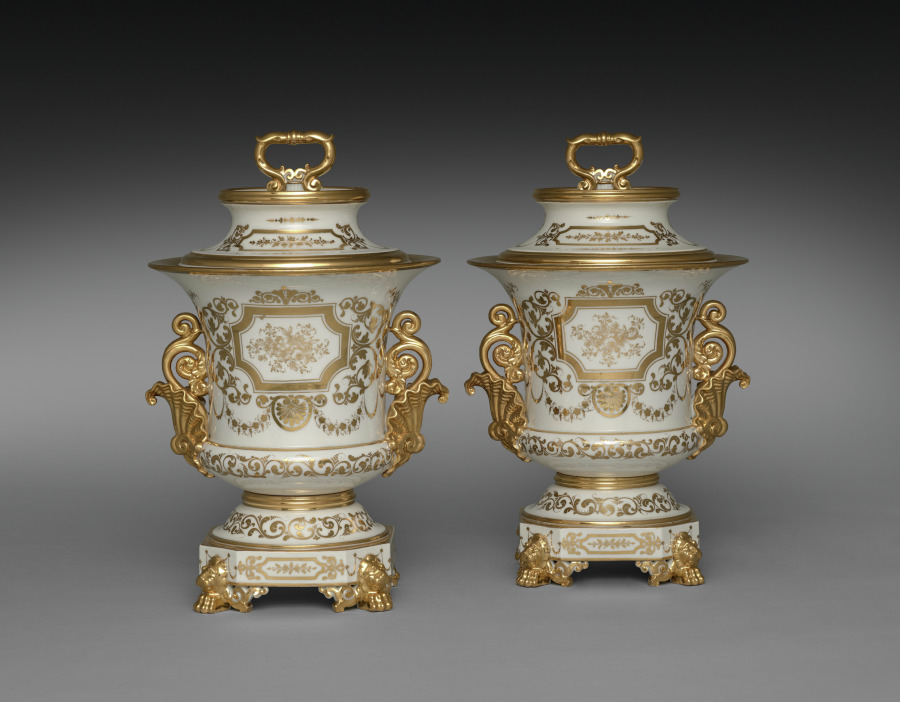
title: Pair of Covered Ice Cream Pails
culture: France, Paris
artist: Factory of Jacob-Petit (French, 1830–1865)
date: c. 1840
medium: gilt porcelain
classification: Ceramic